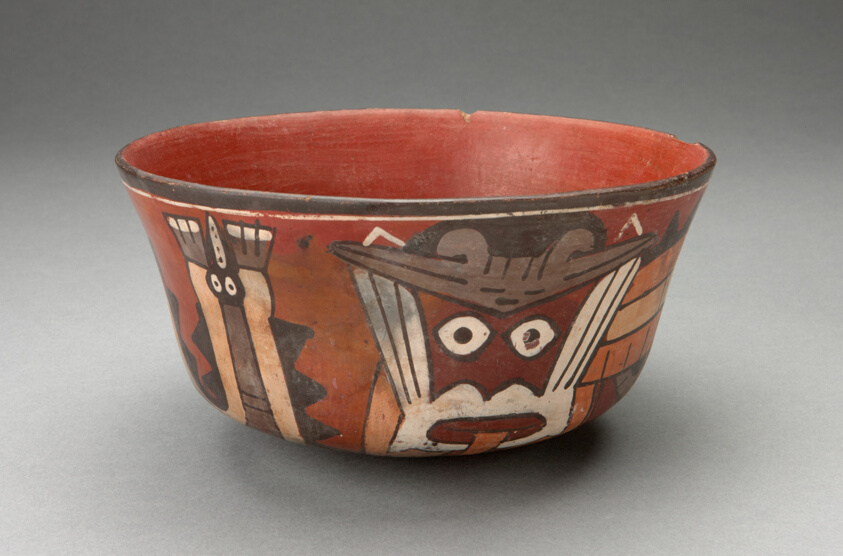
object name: Vessel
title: Bowl Depicting Costumed Ritual Performer with Serpent Attributes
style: nazca, early intermediate period, Pre-Columbian, americas, Arts of the Americas, andean, andes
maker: Nazca; South coast, Peru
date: 180 BCE–500 CE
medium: Ceramic and pigment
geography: Nazca Valley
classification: bowl; earthenware; art of the americas; ceramics; vessel